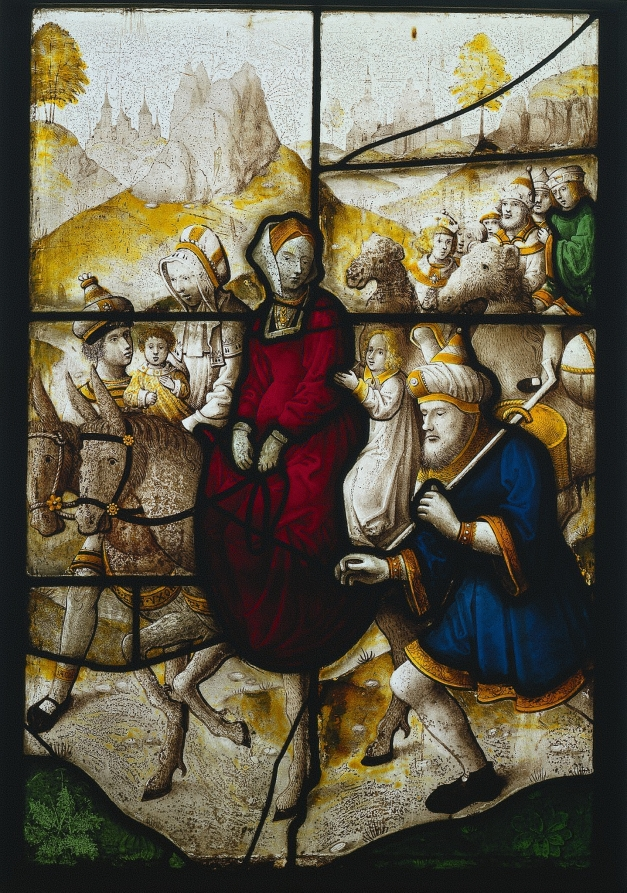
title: Jacob Returning to Canaan with Rachael and Leah Pursued by Laban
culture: North Netherlands, 16th century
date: c. 1525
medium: pot-metal and white glass, and silver stain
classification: Glass